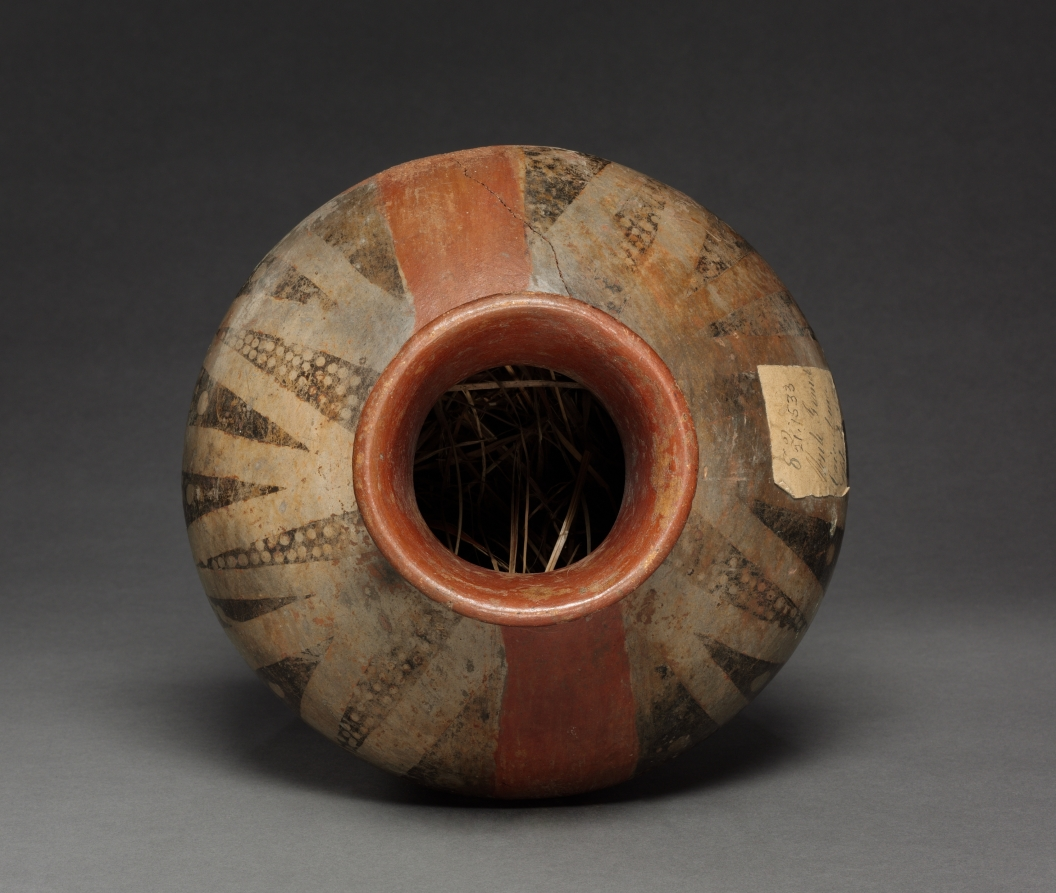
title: Vase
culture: Colombia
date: 1000–1550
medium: pottery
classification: Ceramic